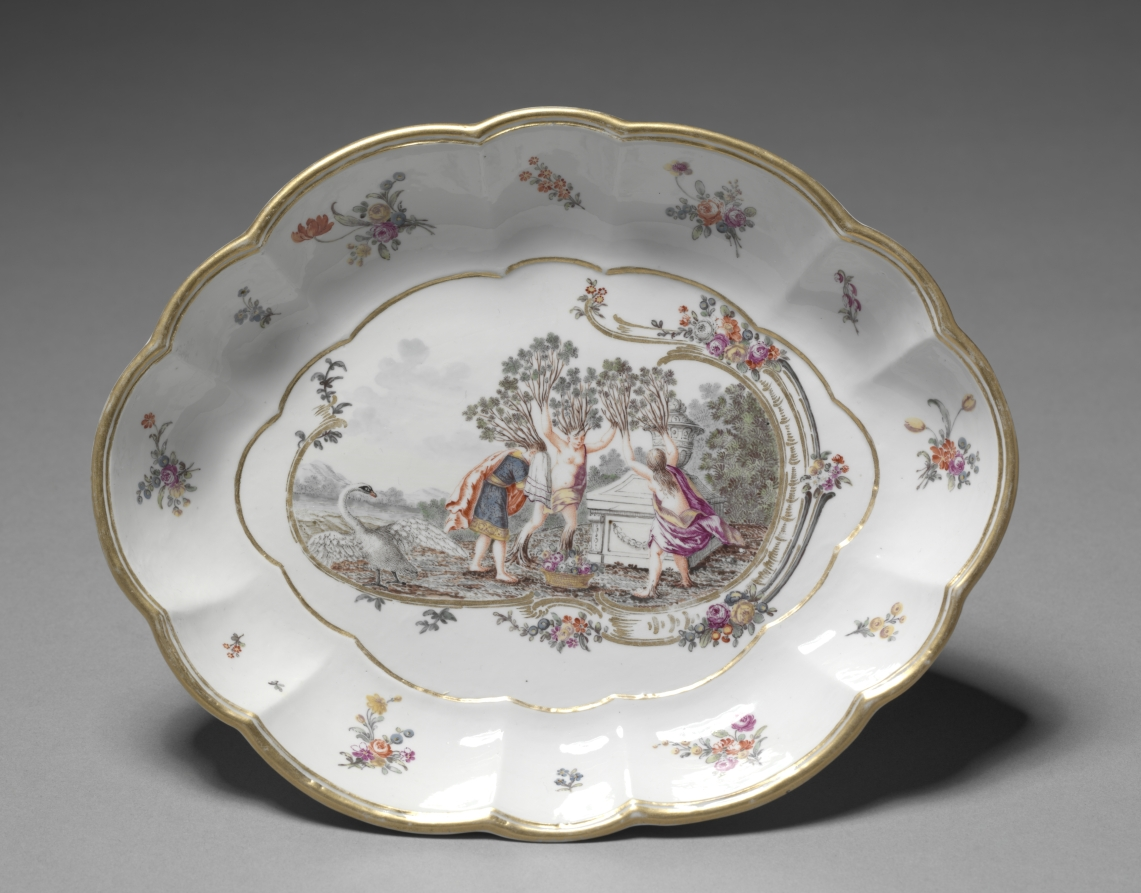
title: Oval Dish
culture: Germany, Nymphenburg, 18th century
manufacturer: Nymphenburg Porcelain Factory (German, founded 1747)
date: c. 1760–65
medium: porcelain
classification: Ceramic